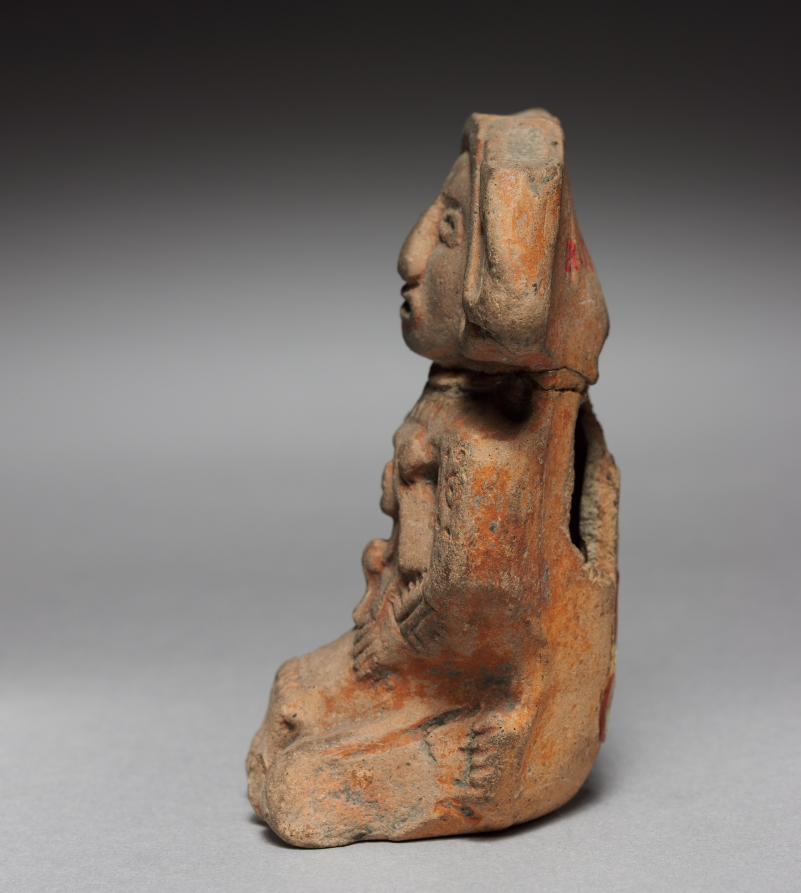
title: Figurine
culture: Mexico, Aztec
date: 1325–1521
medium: pottery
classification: Ceramic